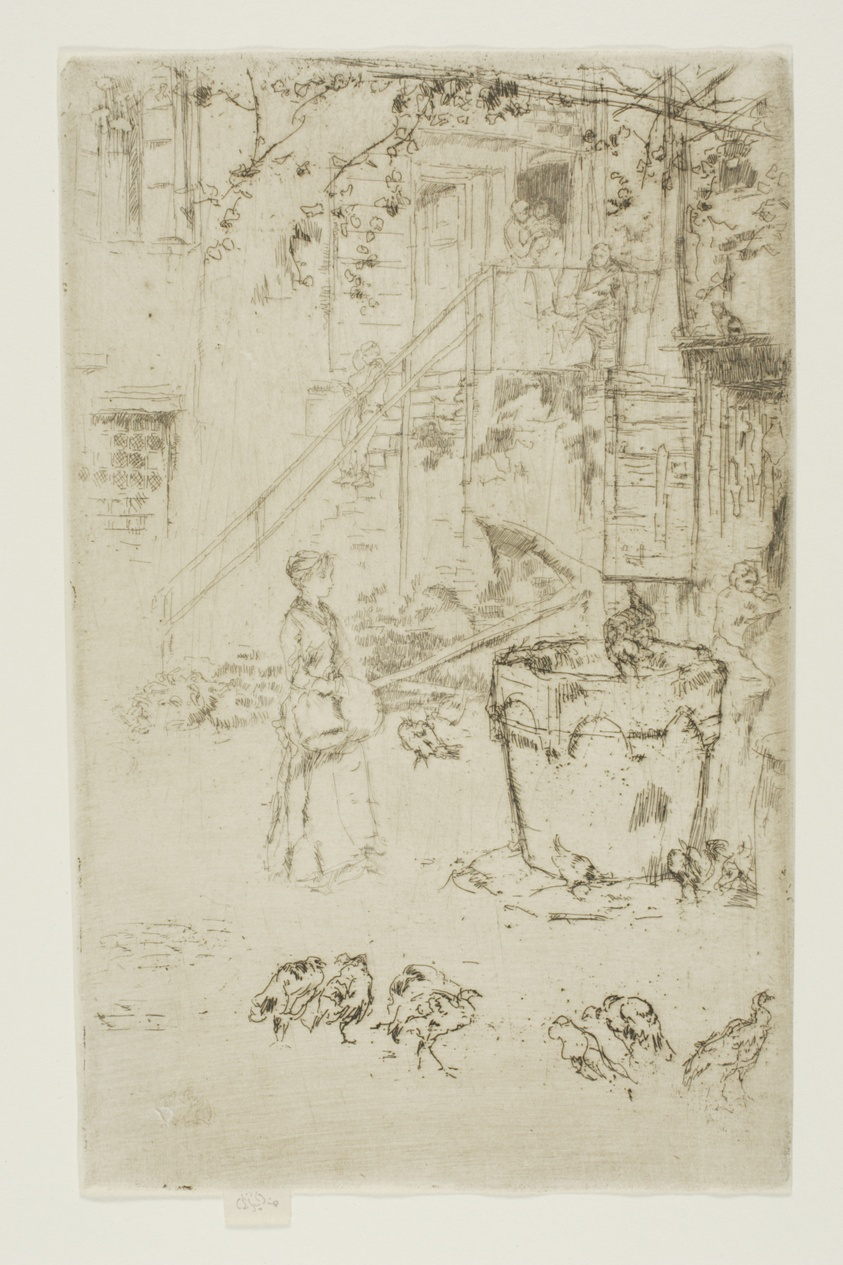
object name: Print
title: Turkeys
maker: James McNeill Whistler (American, 1834-1903)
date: 1880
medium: Etching and drypoint with foul biting in dark brown ink on cream laid paper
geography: United States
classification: etching; drypoint; foul biting; print; prints and drawing; paper